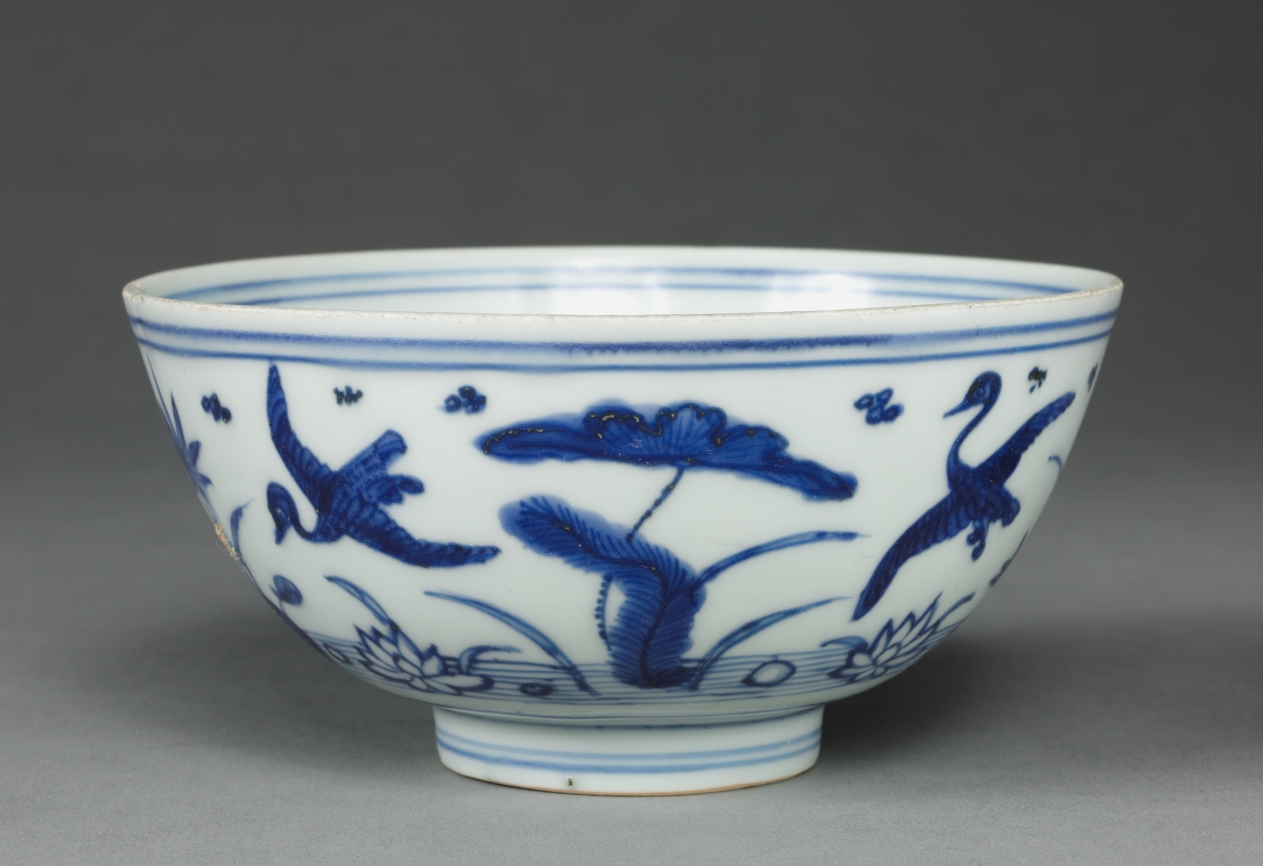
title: Bowl with Ducks over Lotus Pond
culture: China, Jiangxi province, Jingdezhen kilns, Ming dynasty (1368-1644), Wanli reign (1573-1620)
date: 1573–1620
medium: porcelain with underglaze blue decoration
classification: Ceramic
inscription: 永保長春